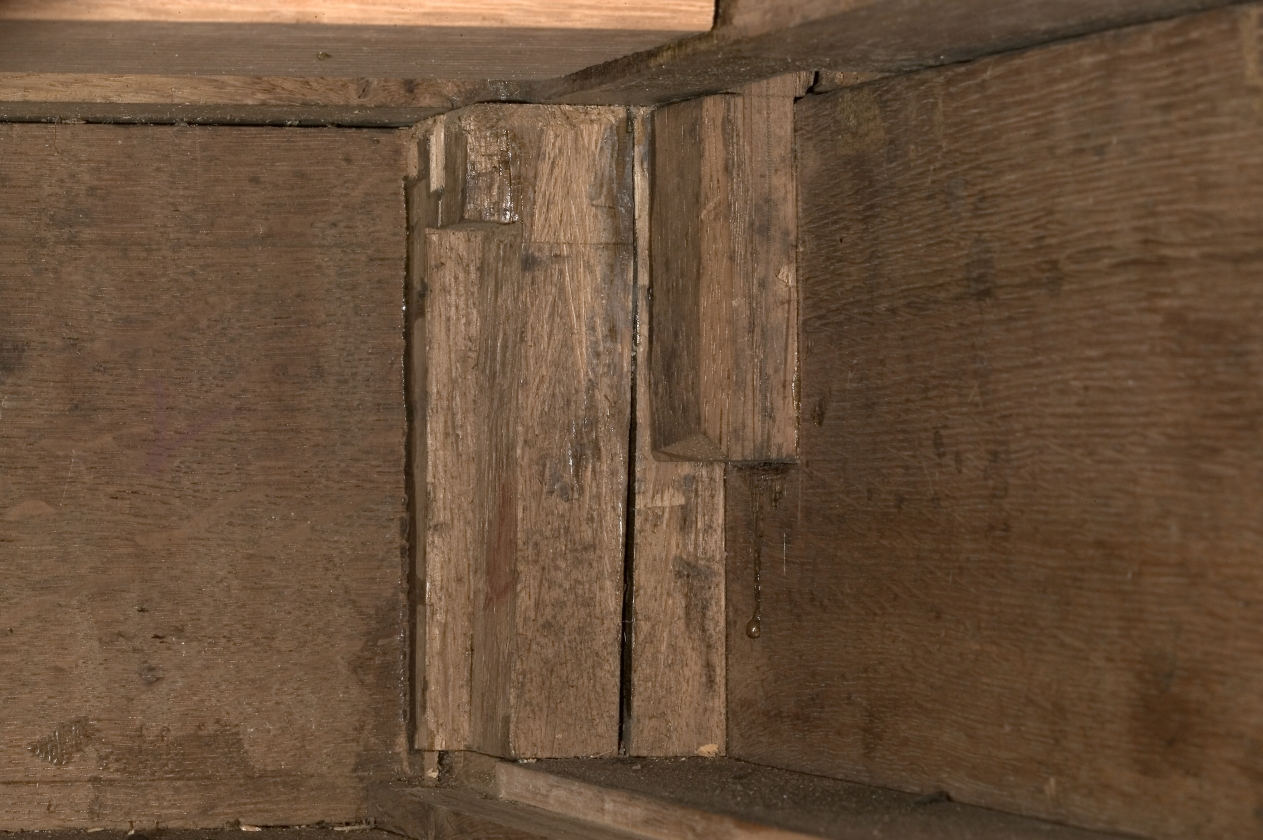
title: Table Desk (Bureau Plat)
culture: France, 18th century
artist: Bernard II van Riesen Burgh (Dutch, 1766)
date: c. 1750– 1760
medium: wood marquetry with gilt bronze mounts, leather top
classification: Furniture and woodwork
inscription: signed three times on bottom edge of apron: B. V. R. B.